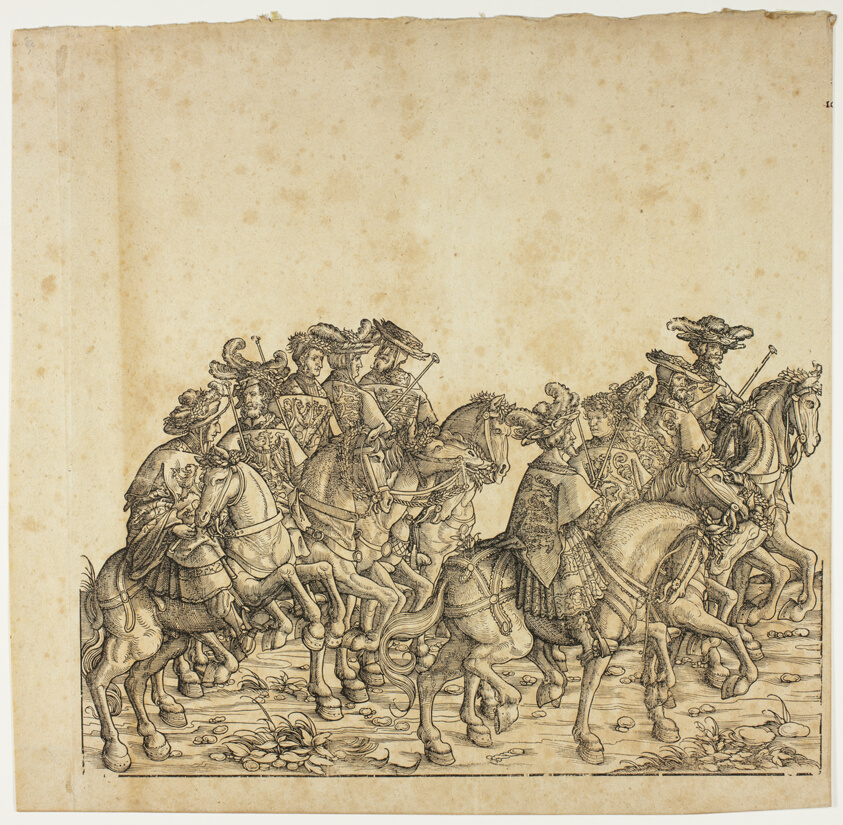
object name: Print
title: Triumph of Maximilian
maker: Hans Burgkmair, the elder (German, 1473-1531)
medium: Woodcut on paper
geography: Germany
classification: print; prints and drawing